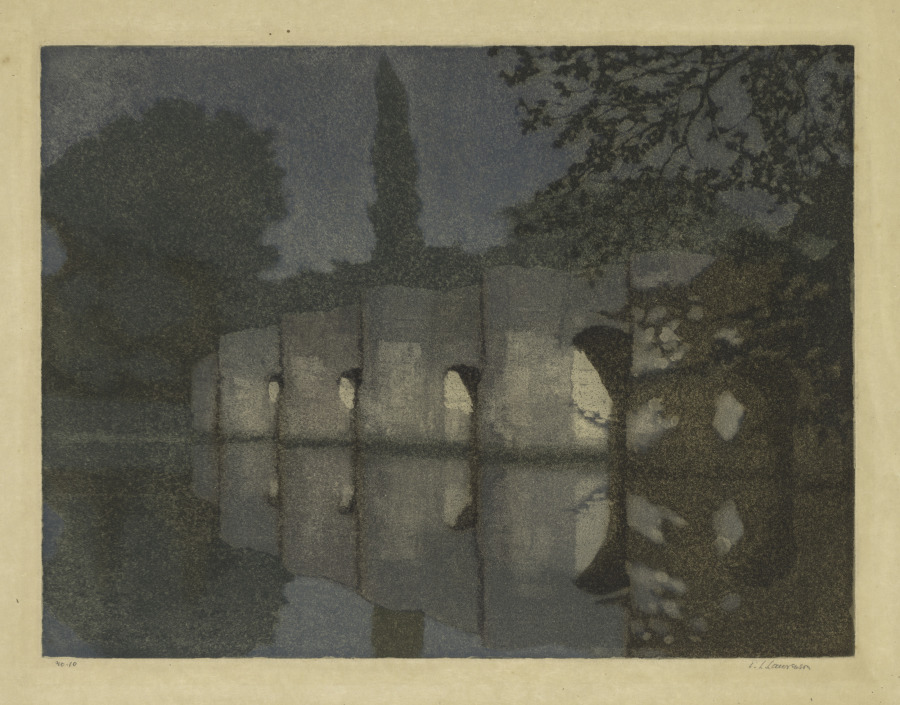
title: Stopham Bridge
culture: England, 19th-20th century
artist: Edward Louis Laurenson (British, 1868–1940)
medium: color aquatint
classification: Print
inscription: Lower left, in graphite: no. 10; lower right, in graphite: E.L Laurenson; lower left margin, in graphite: Stopham Bridge / Last Proof